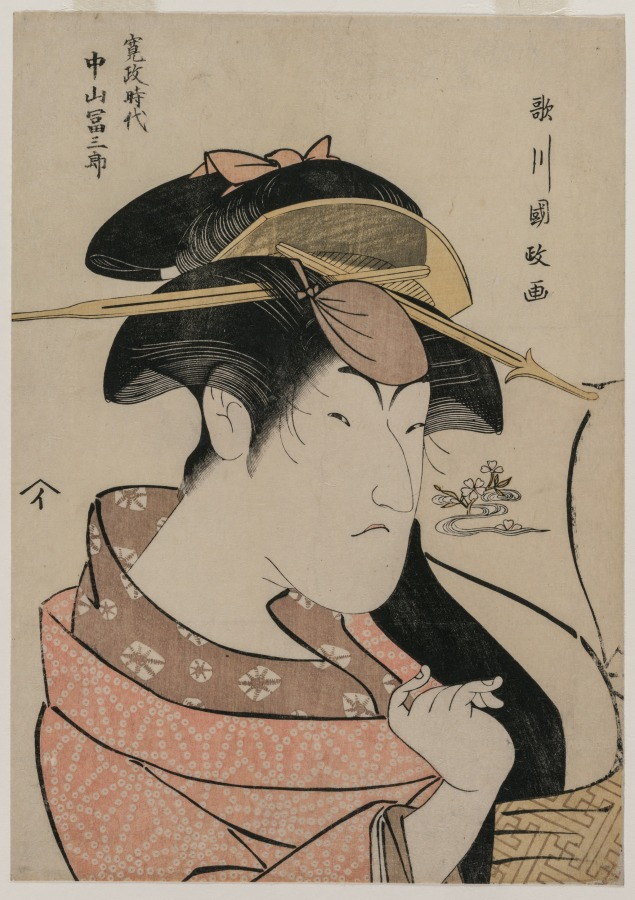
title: Portrait of the Actor Nakayama Tomisaburo as a Woman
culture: Japan, Edo period (1615–1868)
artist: Utagawa Kunimasa (Japanese, 1773–1810)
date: ca. 1800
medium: color woodblock print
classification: Print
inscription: Signature: Utagawa Kunimasa ga Publisher: Sanoya Kihei? (emblem)